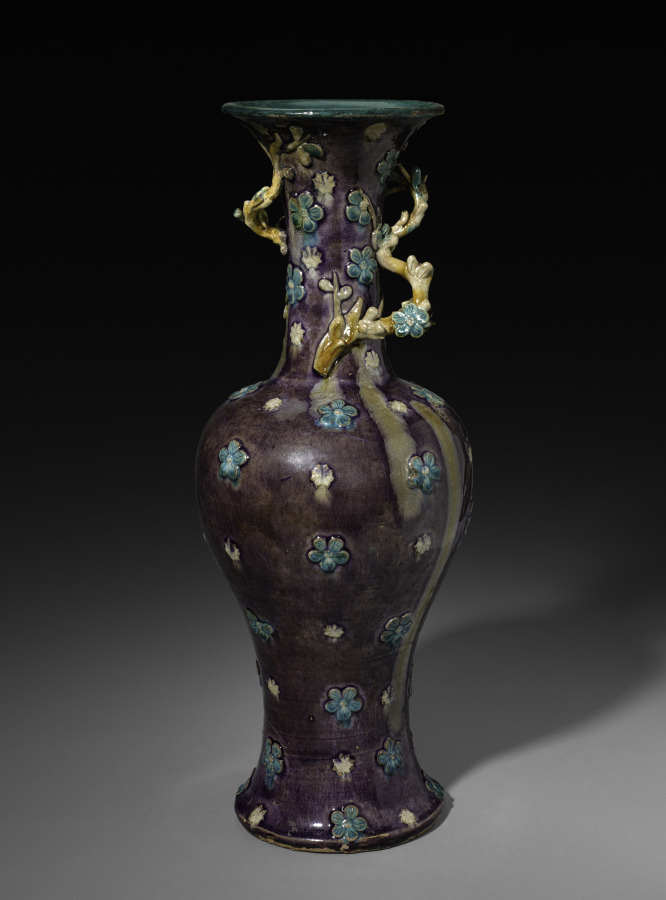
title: Vase with Branch of Plum Blossoms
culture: China, Shanxi province, Ming dynasty (1368-1644)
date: 1500s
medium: Glazed stoneware with molded and modeled decoration, Fahua ware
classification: Ceramic